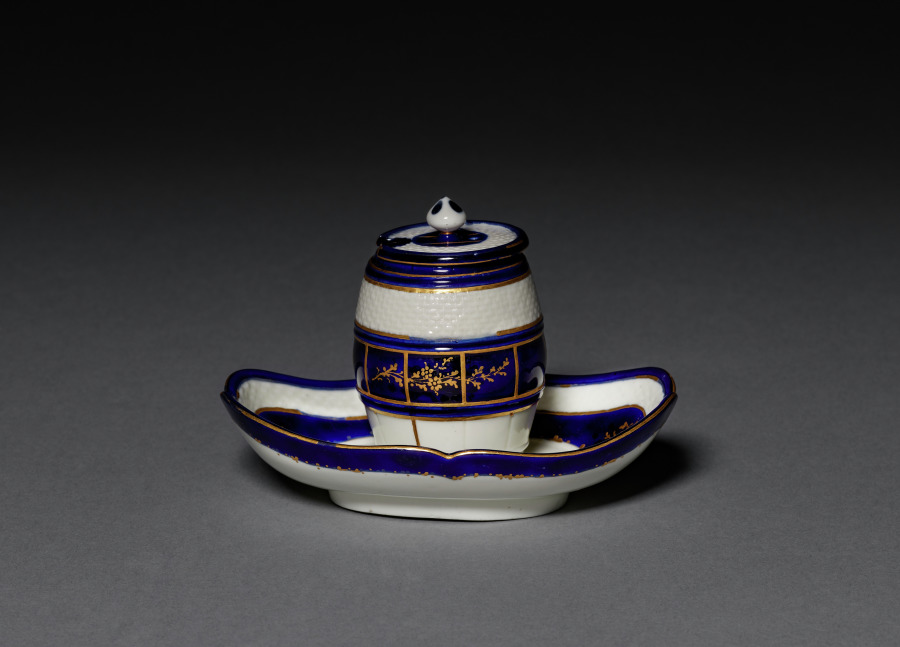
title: Mustard Pot with Cover and Stand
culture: France, Chantilly, 18th century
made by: Chantilly Porcelain Factory (French)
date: c. 1775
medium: soft-paste porcelain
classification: Ceramic